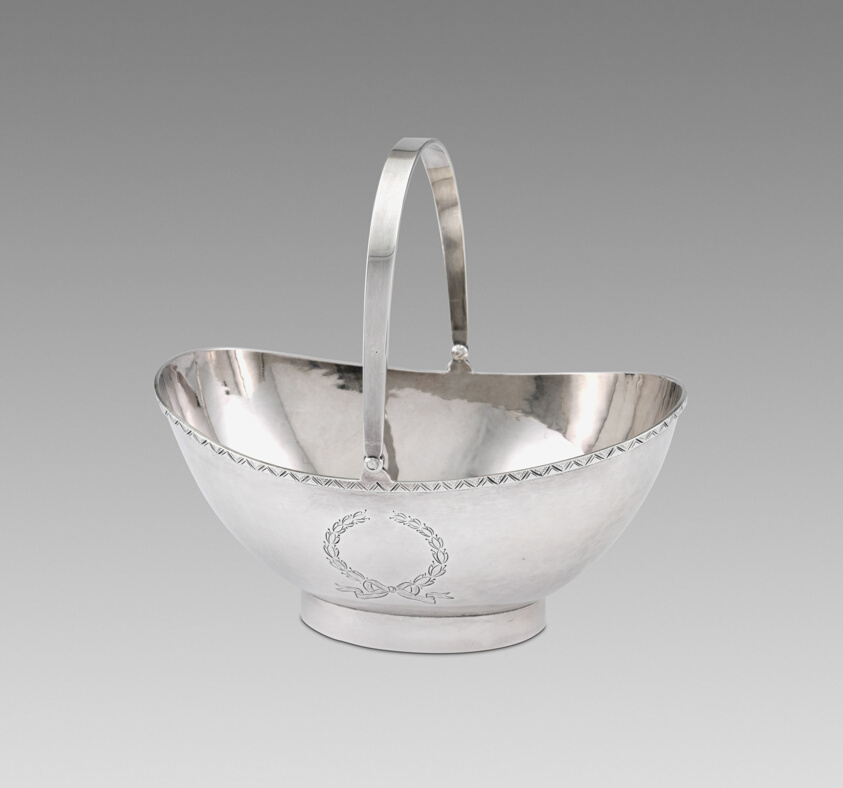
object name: Metalwork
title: Sweetmeat Basket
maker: William Garrett Forbes; American, 1751–1840; New York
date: 1791–1800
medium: Silver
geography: New York City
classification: vessel for serving food; silver; american decorative arts; american arts; decorative arts